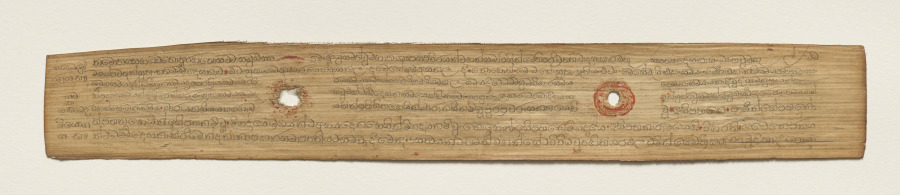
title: Leaf from a Buddhist Manuscript (recto)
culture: Sri Lanka, Singhalese, Late 17th century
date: c. 1700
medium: fiber paper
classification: Manuscript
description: Palm leaf material is still used for manuscripts in Sri Lanka. The palm leaves are prepared first by boiling them, drying them in the sun, and then rubbing them with oils. Scribes then use a metal stylus to incise the text. Then charcoal powder is wiped across the pages, filling in only the inscribed lines.